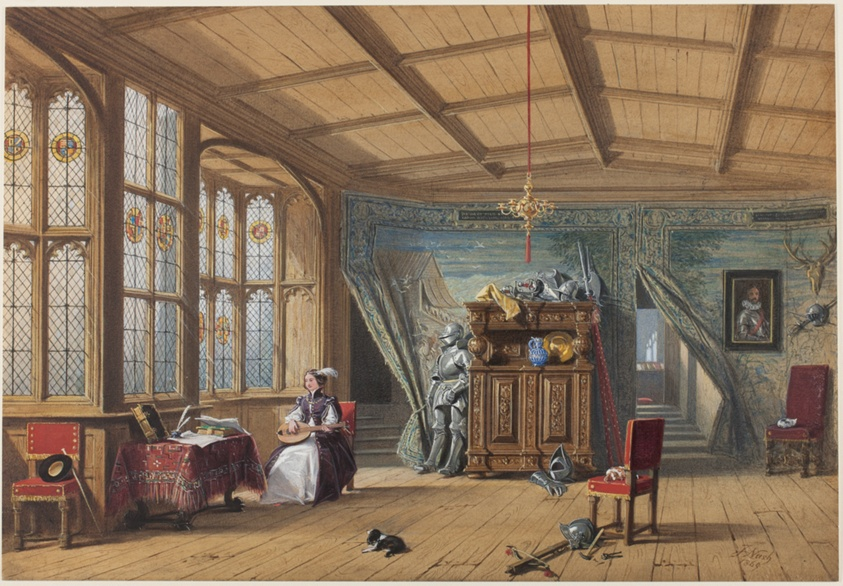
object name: Drawing and Watercolor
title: Room Leading to the Chapel, Knowle, Kent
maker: Joseph Nash (English, 1808-1878)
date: 1869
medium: Watercolor and gouache, with touches of brush and black ink, heightened with white gouache, over graphite on cream wove paper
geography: England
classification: watercolor; drawings (visual works); prints and drawing